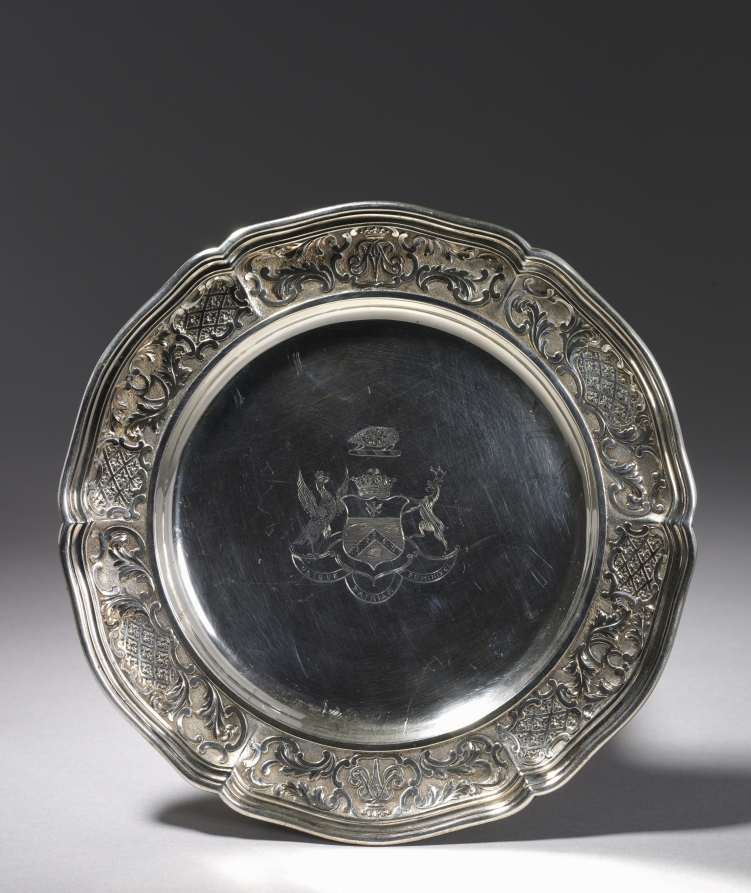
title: Plate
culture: England, 19th century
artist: Paul Storr (British, 1771–1844)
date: c. 1820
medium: silver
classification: Silver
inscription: Crest with a shield in the center and a falcon and deer on either sides of the shield, a crown and a possum. Banner reads 'UBIQUE, PATRIAM, REMINISCI'